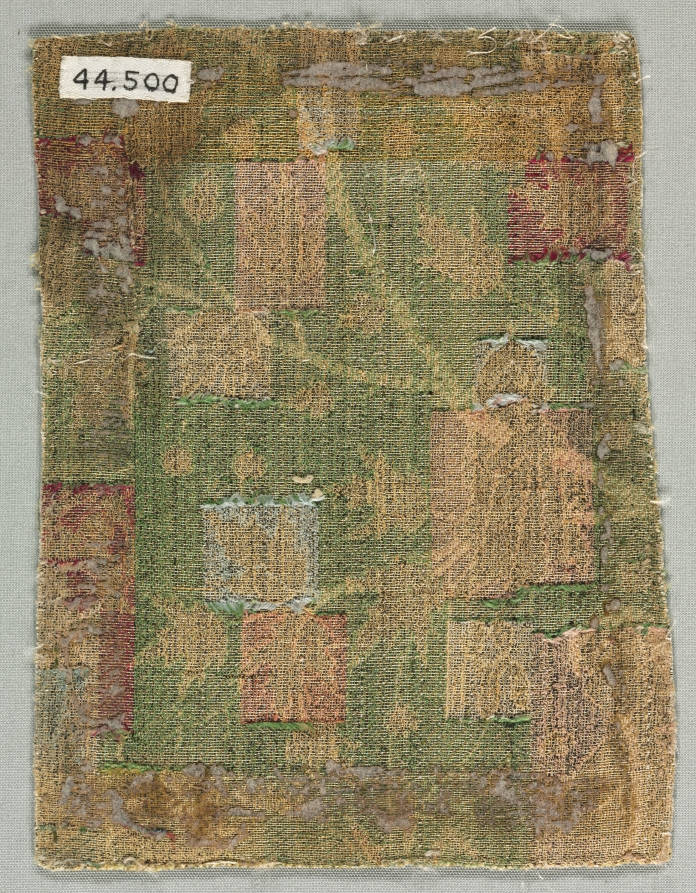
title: Velvet Fragment, Khusrau Sees Shirin Bathing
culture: Iran, Kashan, Safavid period (1501-1722)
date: 1550–99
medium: silk; velvet, cut, pile-warp substitution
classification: Velvet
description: These velvet fragments depict an episode from the Khamsa (Quintet) of Nizami (1141–1209), in which the lovers Khusrau and Shirin first see each other. A pre-Islamic king of Iran, Khusrau has fallen in love with Shirin after seeing her portrait and is traveling to meet her when he happens across her bathing in a stream. Not yet realizing that she is Shirin, Khusrau is transfixed by the woman’s beauty and covets both her and her magnificent black horse. The horse’s mane is just visible here, and she has placed her crown and tunic atop a branch.